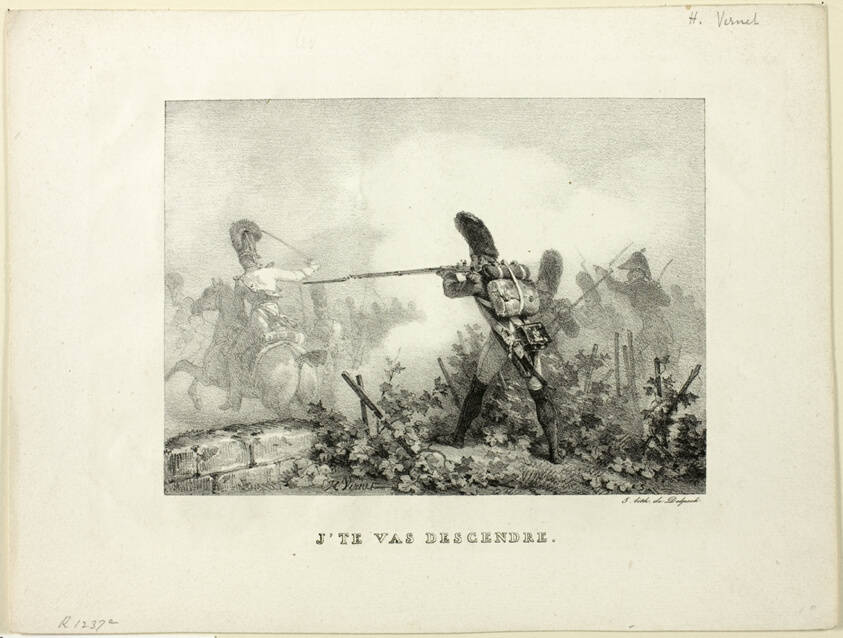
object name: Print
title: Je te vas descendre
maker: Horace Vernet (French, 1789-1863); printed by Francois Seraphin Delpech (French, 1778-1825)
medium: Lithograph in black on ivory wove paper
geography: France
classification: lithograph; print; prints and drawing